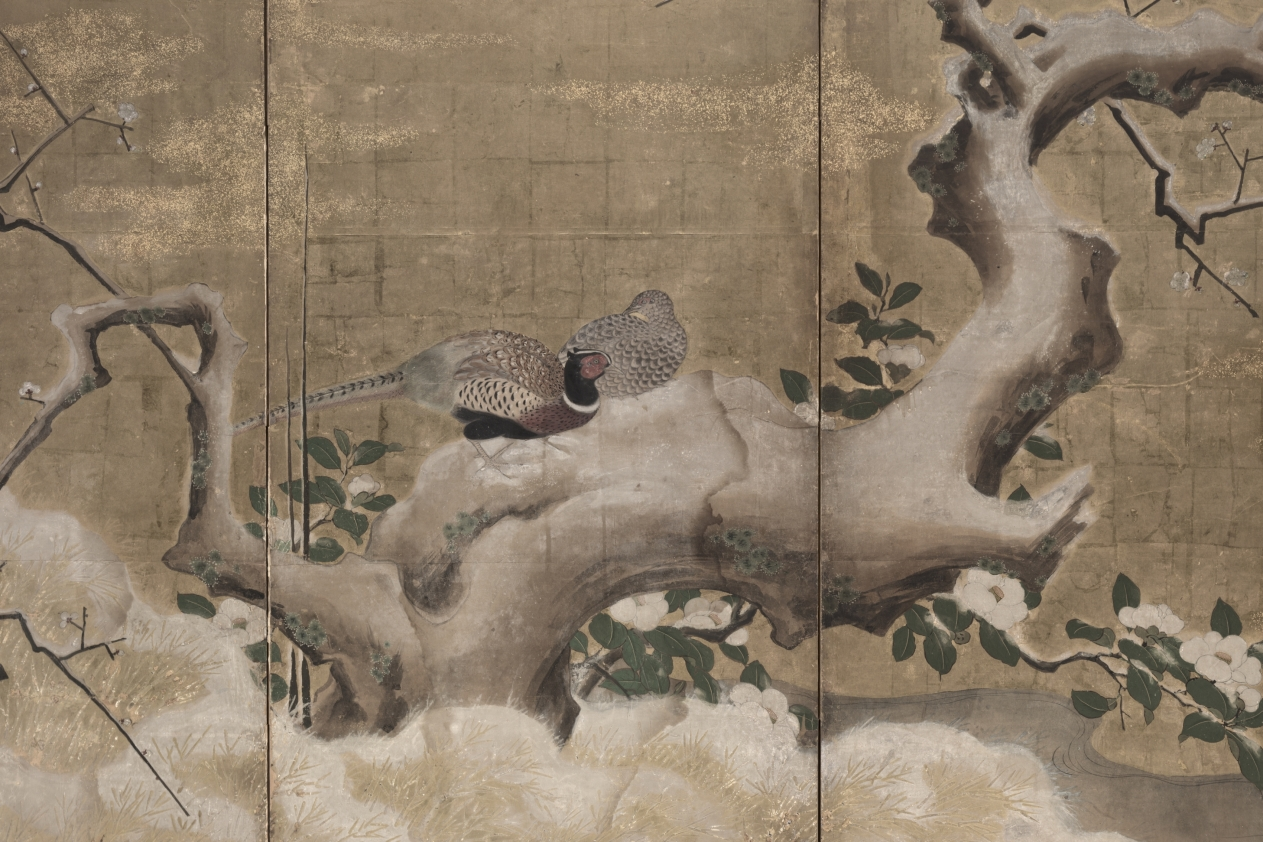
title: Winter Scene with Plum Trees and Pheasants (Birds Right)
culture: Japan, Edo period (1615–1868)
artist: Kano Naonobu (Japanese, 1607–1650)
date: early 1600s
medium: pair of six-fold screens, mineral pigments and gold leaf on paper,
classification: Painting